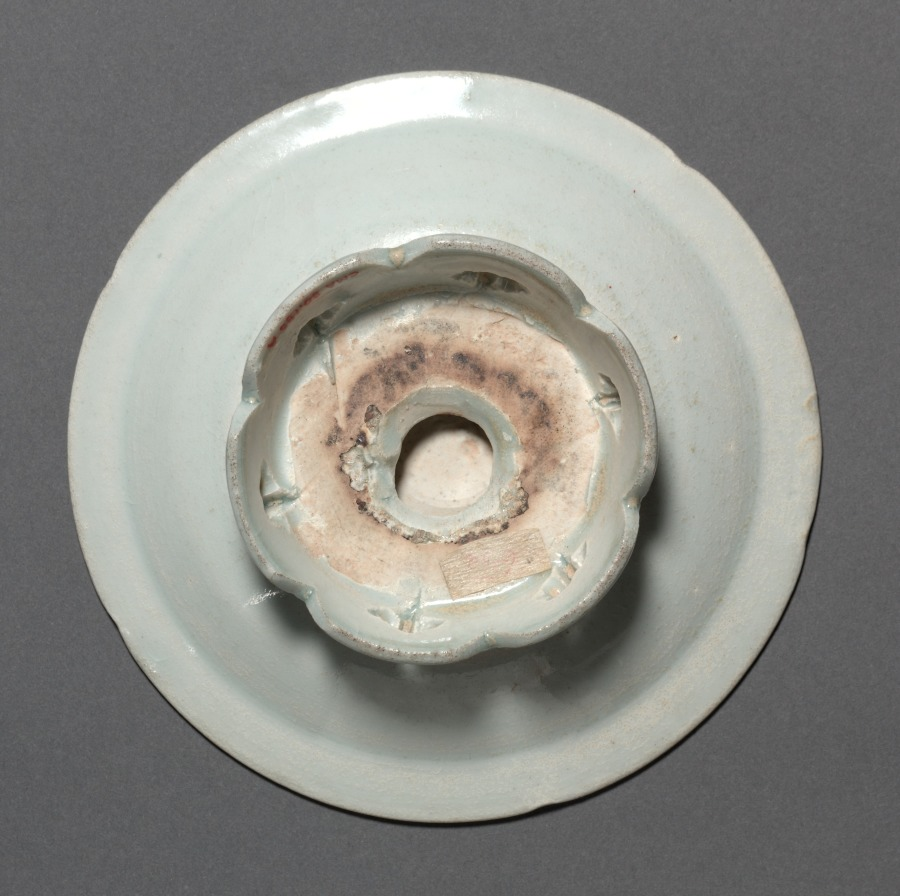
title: Cup and Stand (stand)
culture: China, Southern Song dynasty (1127-1279)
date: 1100s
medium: glazed porcelain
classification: Ceramic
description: The kilns of Jingdezhen in Jiangxi province produced an extremely delicate porcelain made from the local resources of kaolin (white China clay) and petuntse (a feldspathic rock called china stone). It is glazed with a clear bluish-white glaze, thus the name qingbai (blue-white) or yingqing (shadowy blue) for this type of ware.